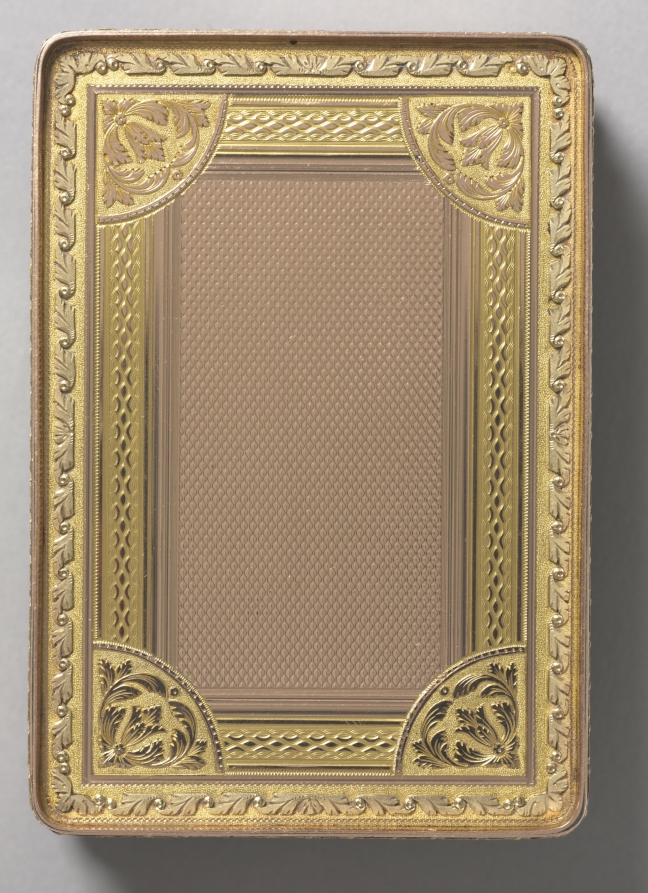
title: Portrait of Napoleon I, Emperor of the French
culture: Box: Switzerland; miniature: France, 19th century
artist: Jean-Baptiste Isabey (French, 1767–1855)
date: 1810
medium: watercolor on ivory in a Swiss gold box with diamonds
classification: Miscellaneous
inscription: inscribed inside cover: "Précieux souvenir de reconnaissance donné par l'Empr. Napoléon 1er à L'Abbé Bonavita, son Aumônier."